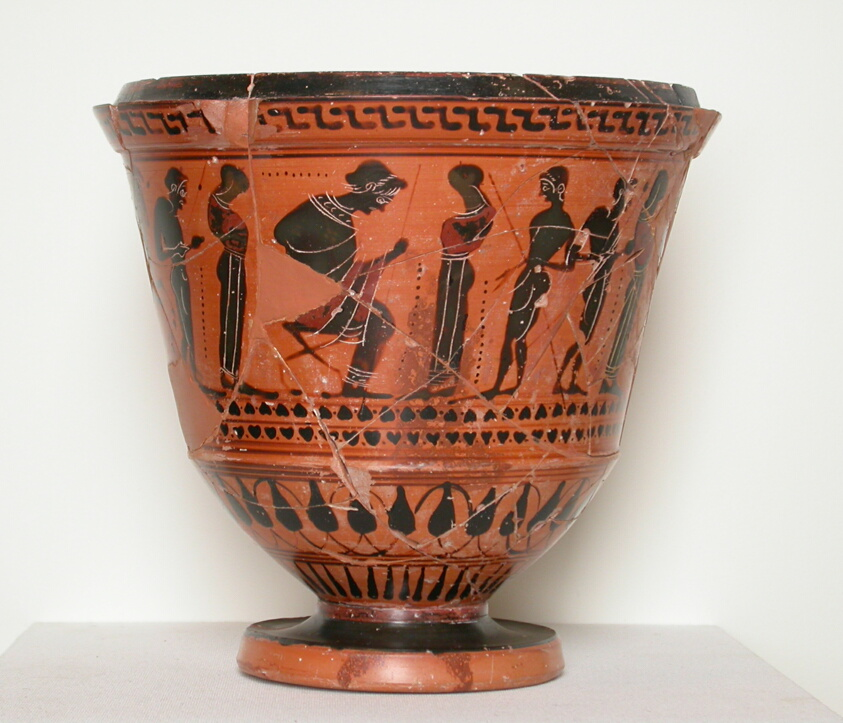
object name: Vessel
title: Pyxis (Container for Personal Objects)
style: greek, black-figure, ancient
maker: Greek; Athens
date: late 6th century BCE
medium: terracotta, black-figure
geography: Greece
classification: ceramics; vessel; ancient art